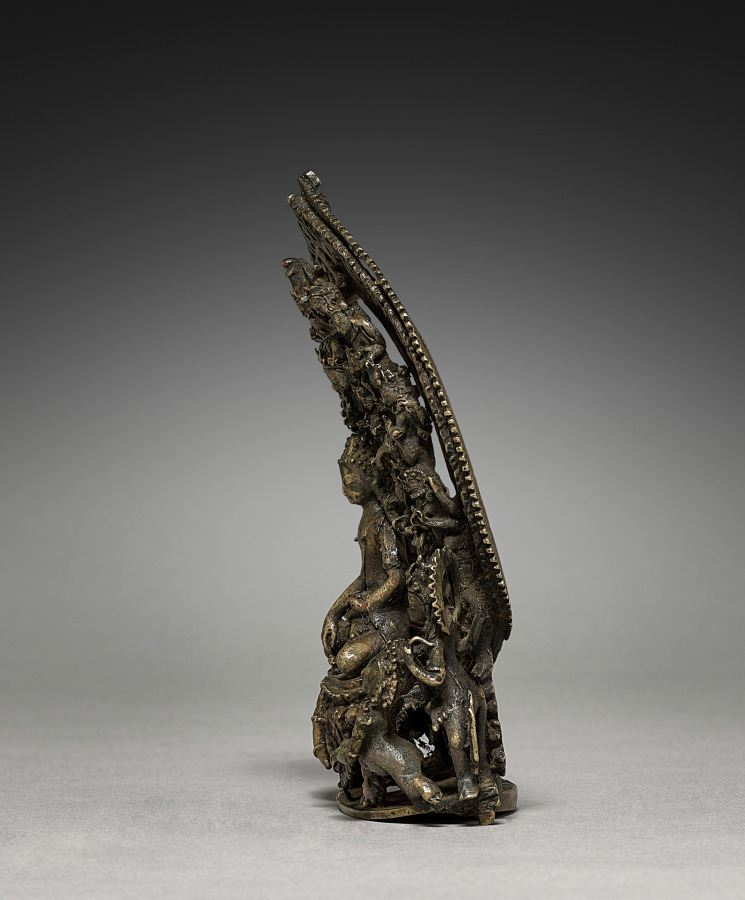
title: Triumph of the Buddha, Marvijaya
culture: Nepal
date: 1400s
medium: bronze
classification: Sculpture